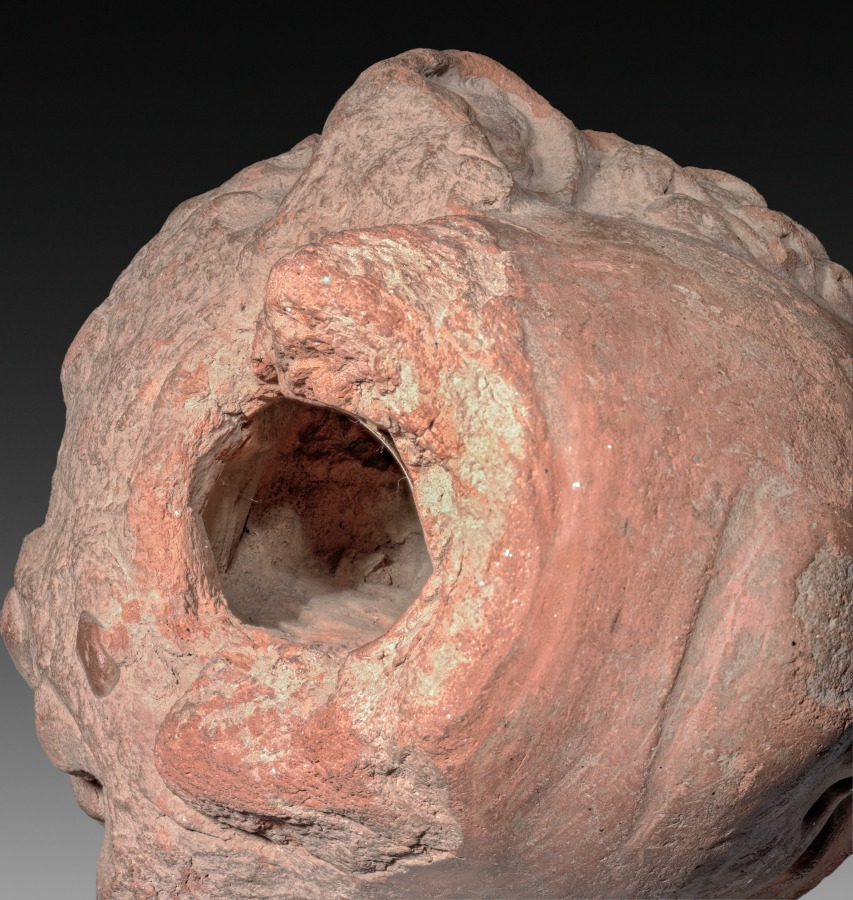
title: Head of Buddha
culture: India, Kashmir, Akhnur school, 8th century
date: 700s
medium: Clay, accidentally burned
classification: Sculpture